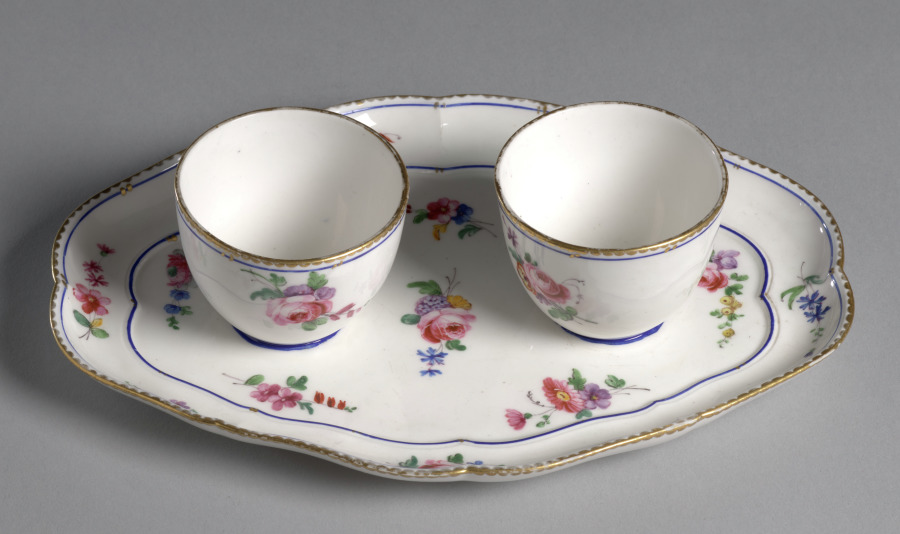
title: Jam Pots on Stand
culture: France, 18th century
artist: Sèvres Porcelain Factory (French, est. 1756)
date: c. 1760's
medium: porcelain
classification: Ceramic